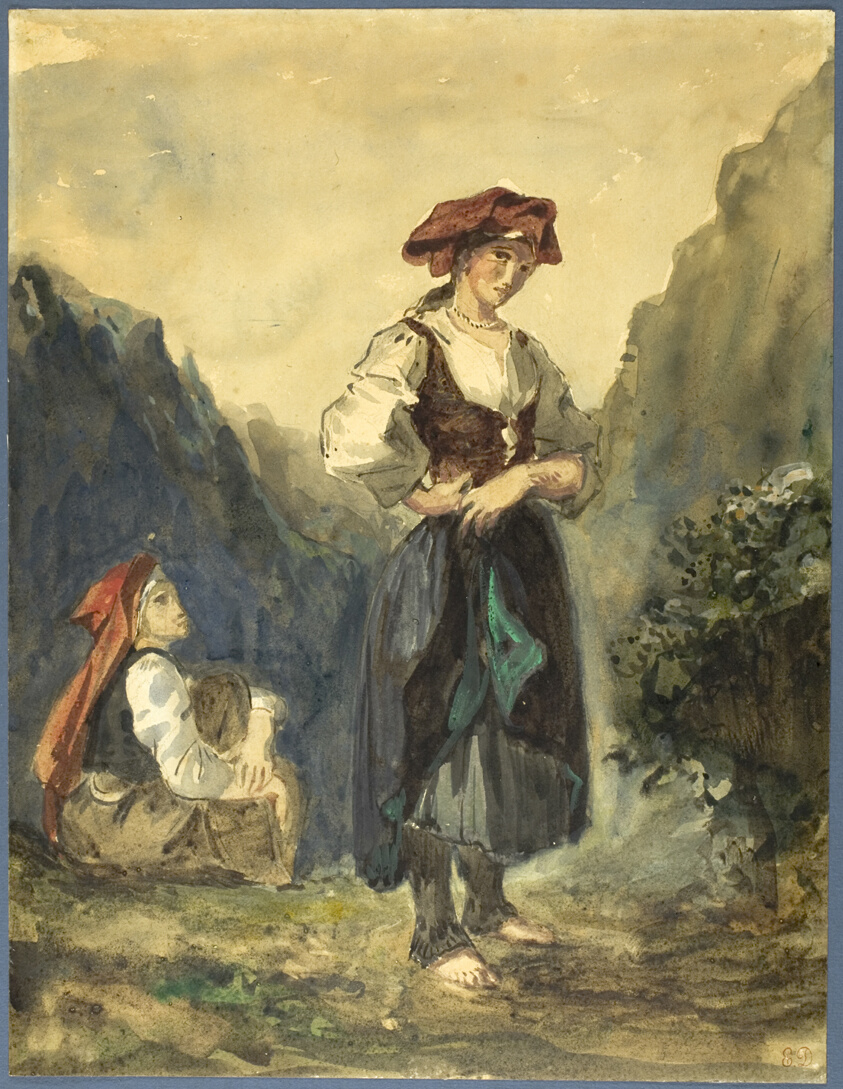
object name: Drawing and Watercolor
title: Peasant Women from the Region of the Eaux-Bonnes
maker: Eugène Delacroix (French, 1798-1863)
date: 1845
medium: Watercolor, with touches of gouache, over traces of graphite, on cream wove paper, laid down on cream wove paper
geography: France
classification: watercolor; drawings (visual works); prints and drawing